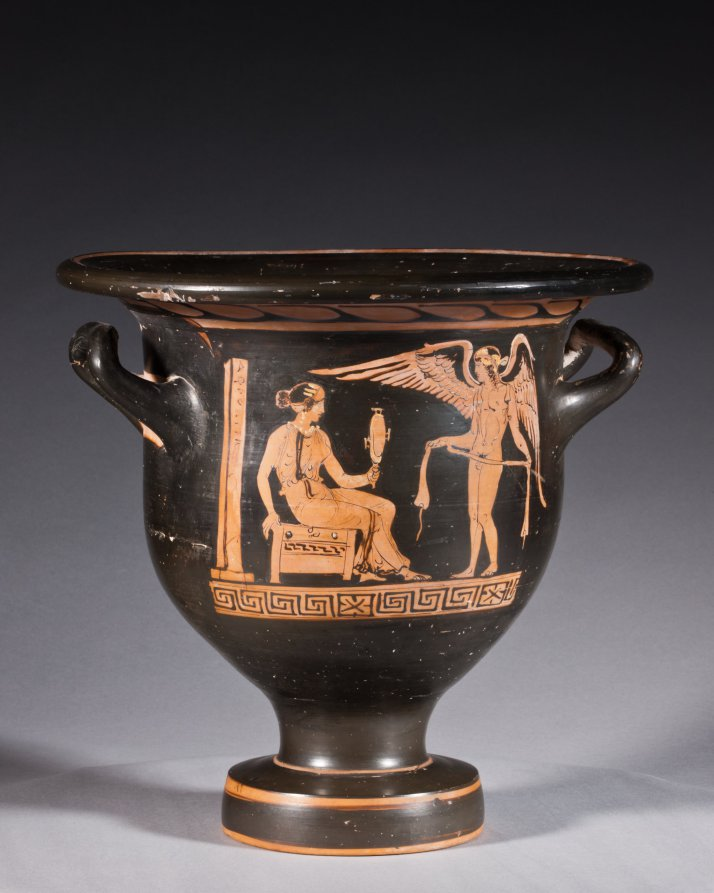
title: Red-Figure Bell Krater (Mixing Vessel): Aphrodite and Eros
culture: South Italian, Apulian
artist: attributed to Graz Painter (South Italian, Apulian, active c. 380–360 BCE)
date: c. 370–360 BCE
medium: ceramic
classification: Ceramic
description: This small mixing vessel shows a finely dressed woman seated on a chest and holding up a mirror to admire herself. Before her stands Eros, the winged god of love, holding a ribbon or sash. Behind the woman stands a pillar with the inscription ΑΦΡΟΔΙΤΗ, or APHRODITE, the goddess of love. Such labels are rare on vases, and scholars debate whether this names the woman shown as Aphrodite herself, with her son Eros, or a bride envisioning herself as Aphrodite, just before her wedding.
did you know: The dancing nude youths on the reverse are unusual; typically they would be standing and draped.